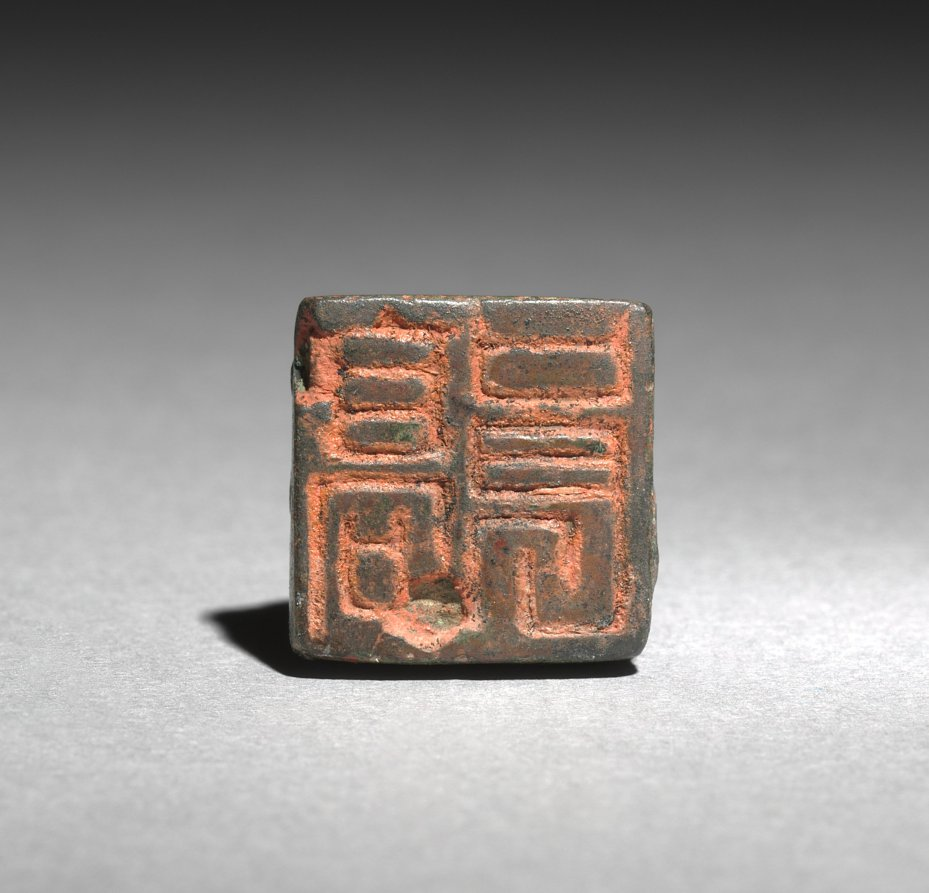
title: Seal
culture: Korea, Goryeo dynasty (918–1392)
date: 918–1392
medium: bronze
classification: Metalwork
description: A large quantity of bronze seals were excavated from tombs of the Goryeo dynasty. This turtle-shaped seal bears two inscribed characters: 高良, meaning "great integrity." The red cinnabar paste is still visible, indicating it must have been used to sign various documents, while its owner was still alive.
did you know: A large quantity of bronze seals excavated from tombs of the Goryeo dynasty is closely related to the development of metallurgy in 13th-century Korea that allowed the transition from wood type to movable metal type printing.